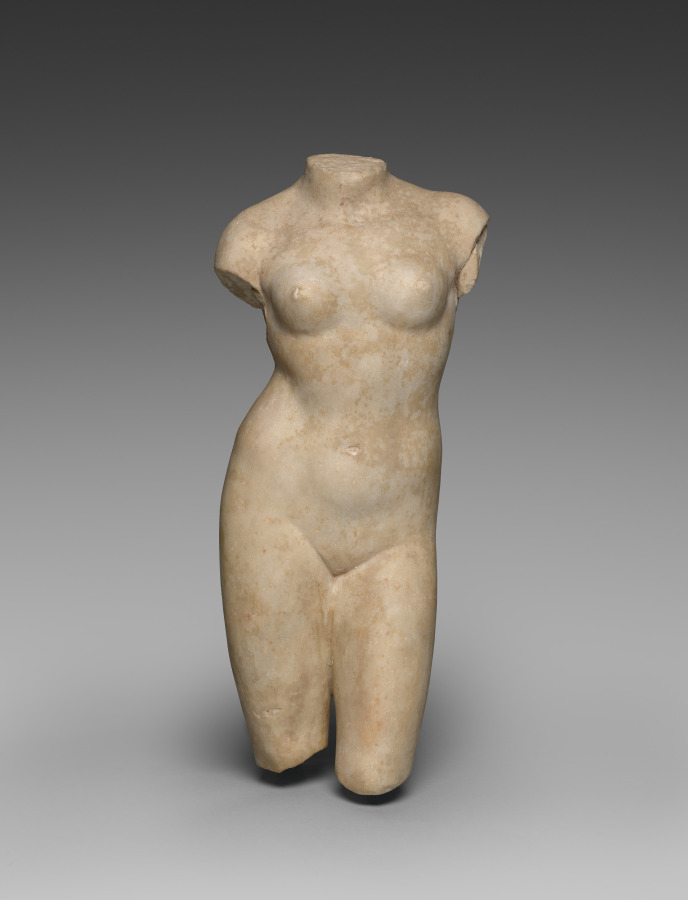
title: Torso of a Woman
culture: Italy, Roman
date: 100 BCE–400 CE, or modern, before 1927?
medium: marble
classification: Sculpture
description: Even without her head, limbs, or additional attributes, the nudity of this female statuette connects her to Aphrodite, goddess of love, or Venus, her Roman parallel. Female nudity was first realized in large scale in the mid-300s BC by the famous Athenian artist Praxiteles (395–330 BC), whose sculpture of Aphrodite was prominently displayed in a shrine in the city of Knidos (in present-day Turkey). For centuries thereafter, the female nude became a great favorite for Greek and Roman artists. The tradition continued into modern times, leading some to question the ancient origins of this sculpture.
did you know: The nudity of this female statuette connects her to Aphrodite or Venus, goddess of love.